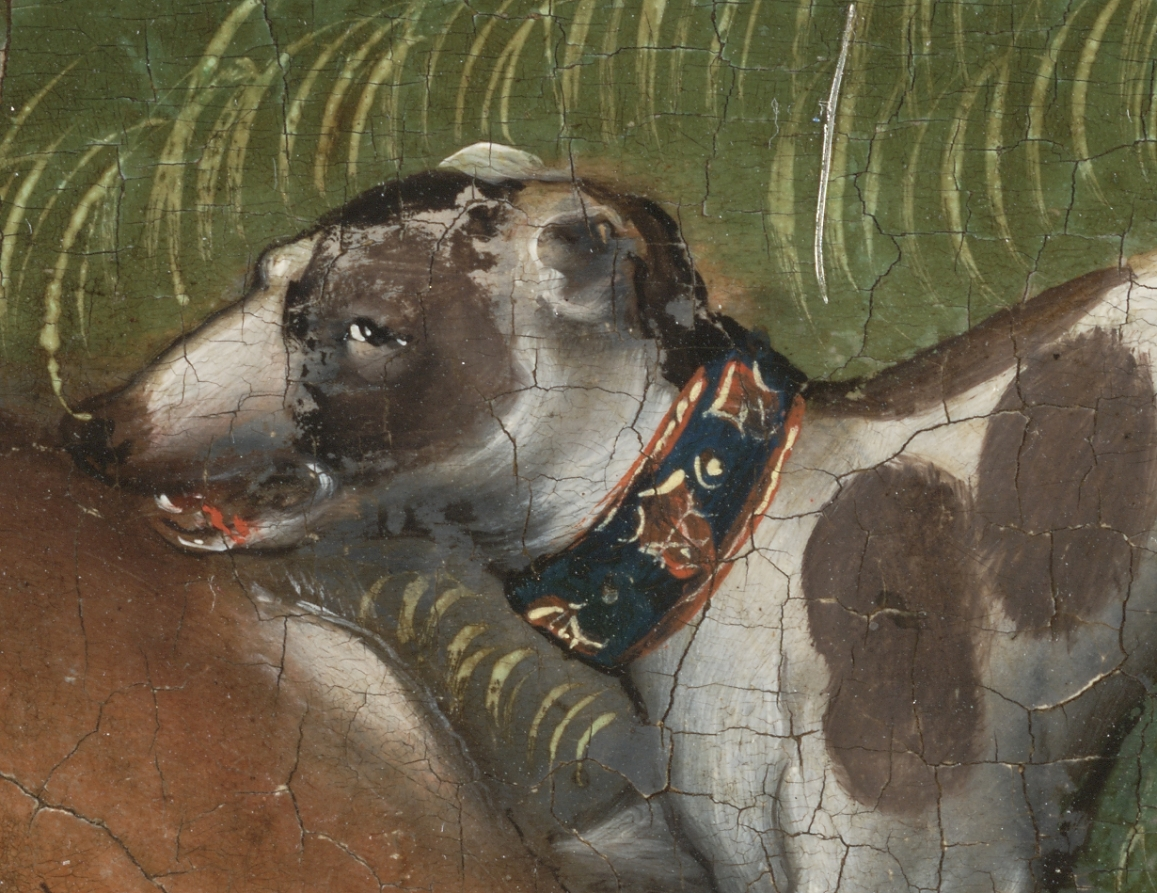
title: Hunting near Hartenfels Castle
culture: Germany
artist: Lucas Cranach (German, 1472–1553)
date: 1540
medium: oil, originally on wood, transferred to masonite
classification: Painting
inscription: Signed lower right on boat with a winged serpent, and dated: 1540 [inventory number, lower right: 1577]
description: The Protestant rulers of Saxony commissioned this animated hunt scene, set near their residence seen in the background, Hartenfels Castle (in eastern Germany). John Frederick the Magnanimous, in the bottom left corner, wears dark green hunting attire; he spans his crossbow and waits for his courtiers and dogs to chase a stag across the river. His wife, the Electress Sibylle, stands at right, poised to take the first ceremonial shot. The prince electors of Saxony were passionate practitioners of hunting with dogs—elaborate, highly rehearsed occasions, coordinated by the use of signals from hunting horns. Cranach dated this work and his signature is the winged snake at lower right. 1577 in the right corner is an inventory number.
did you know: Humans, dogs, and deer make up most of the creatures in this busy scene—but not all of them! Look closely at the background to spot a bear and three boars.